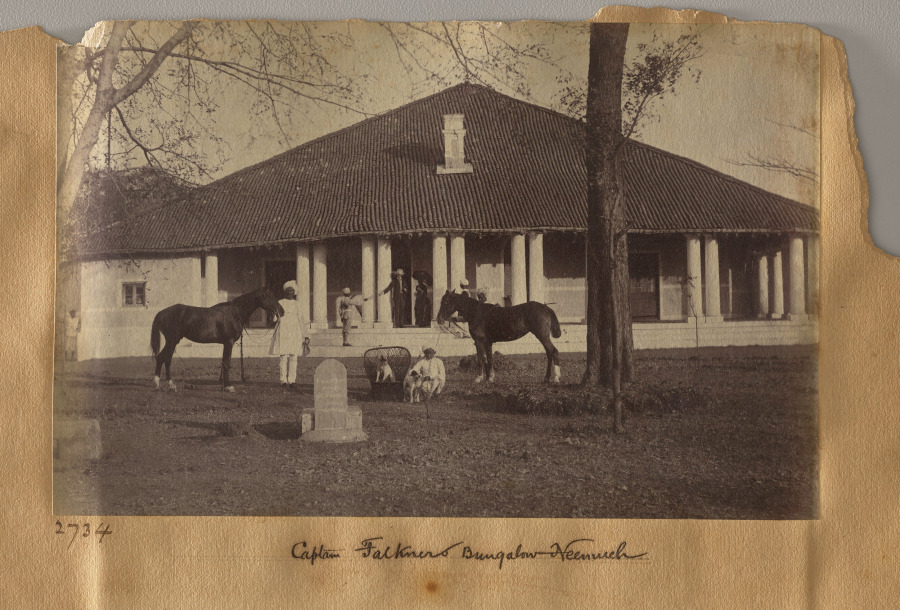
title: Captain Falkner's Bungalow, Neemuch (recto, top)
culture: India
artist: Raja Deen Dayal (Indian, 1844–1905)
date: c. 1882–87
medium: albumen print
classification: Photograph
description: These photographs are part of an album, now disassembled, of around 105 photographs taken in India between 1885 and summer 1887 that provide glimpses into the lives of the British colonial elite and royal and upper-class Indians. The museum holds another group of 37 pictures from this album (2016.266), which was probably commissioned by a British civil servant visiting or working in India around 1888 as a personal souvenir of his experiences there.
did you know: Raja Deen Dayal is regarded now, and was considered during his lifetime, to be India’s most important 19th-century photographer.